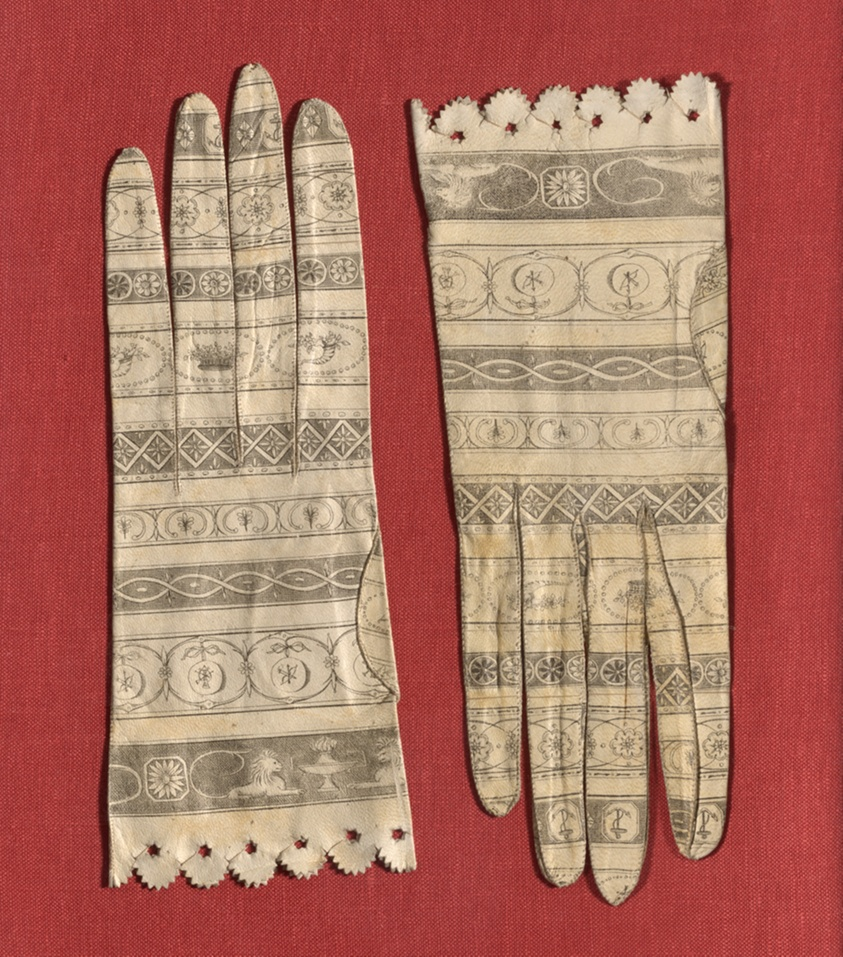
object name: Costume and Accessories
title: Pair of Gloves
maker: Spain, Barcelona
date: c. 1800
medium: Leather, copperplate printed; punched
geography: Barcelona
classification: textile; costume accessory; costume